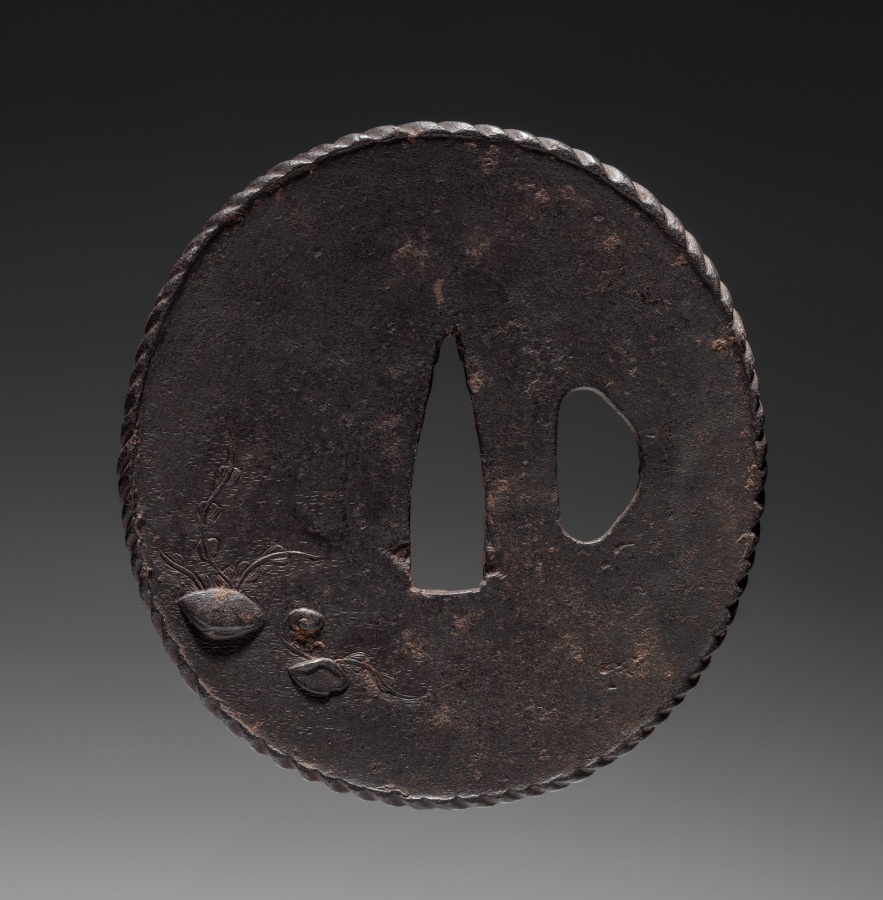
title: Sword Guard (Tsuba) with Hermit Crab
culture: Japan, possibly Edo period (1615-1868)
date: c. 1615–1868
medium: iron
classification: Arms and Armor